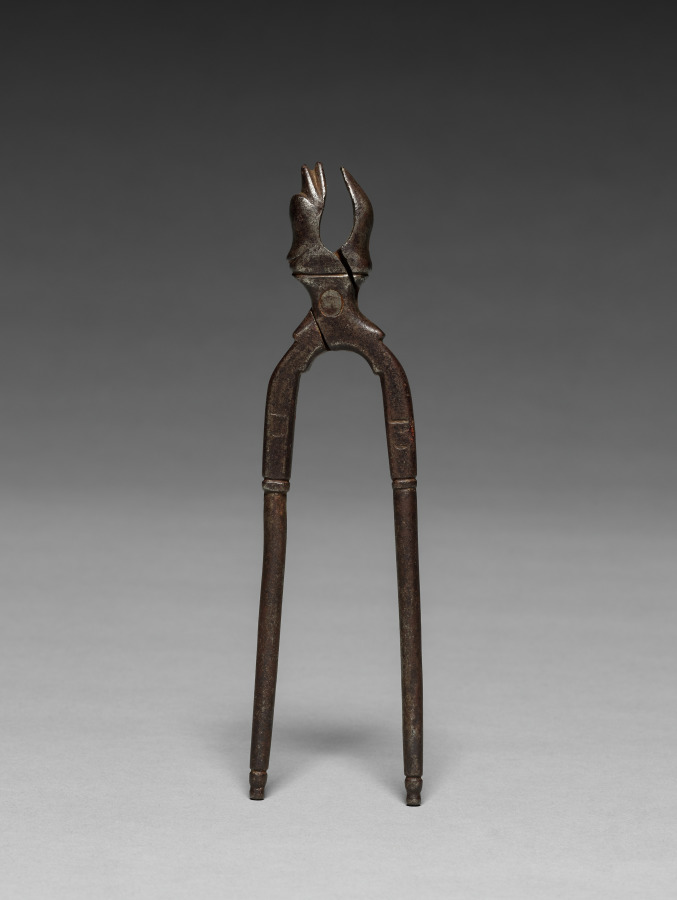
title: Pliers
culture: Europe, 16th-17th century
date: 1500s–1600s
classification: Tool